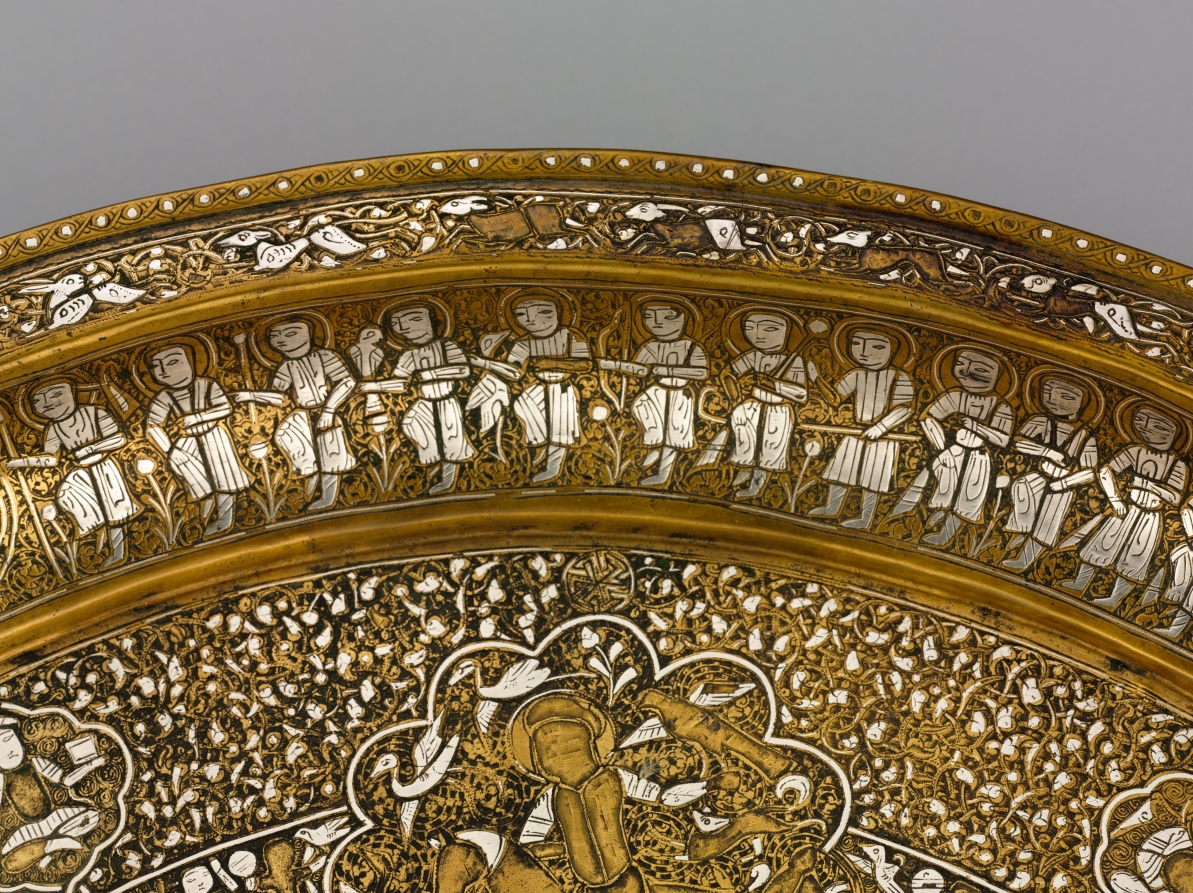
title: Tray Portraying Courtly Pleasures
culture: Syria, Ayyubid period (1171–1260)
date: 1240s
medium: sheet brass inlaid with silver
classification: Metalwork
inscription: The presence of ligatures in the narrow circular bands with interconnected human and animal figures suggests this may be a degenerate form of animated script. It is indecipherable.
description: This tray features images of courtly life interspersed with astronomical symbols. The scenes contained within large multilobed medallions display an enthroned prince with lions at his feet, a banquet, a hunt, dancers, and musicians. Contained within the concentric circles there are also references to solar and lunar motifs, including figures holding sunbursts and lunar crescents. This tray is made of a single sheet of brass and the silver inlay, which is best preserved on the tray’s inner curve, suggests its original brilliance.